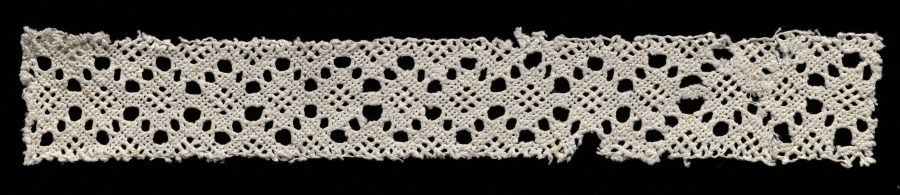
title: Lace Fragment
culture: Italy, Genoa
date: 1650–99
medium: Needle lace (Punto Avorio or Ivory Stitch) insertion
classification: Lace